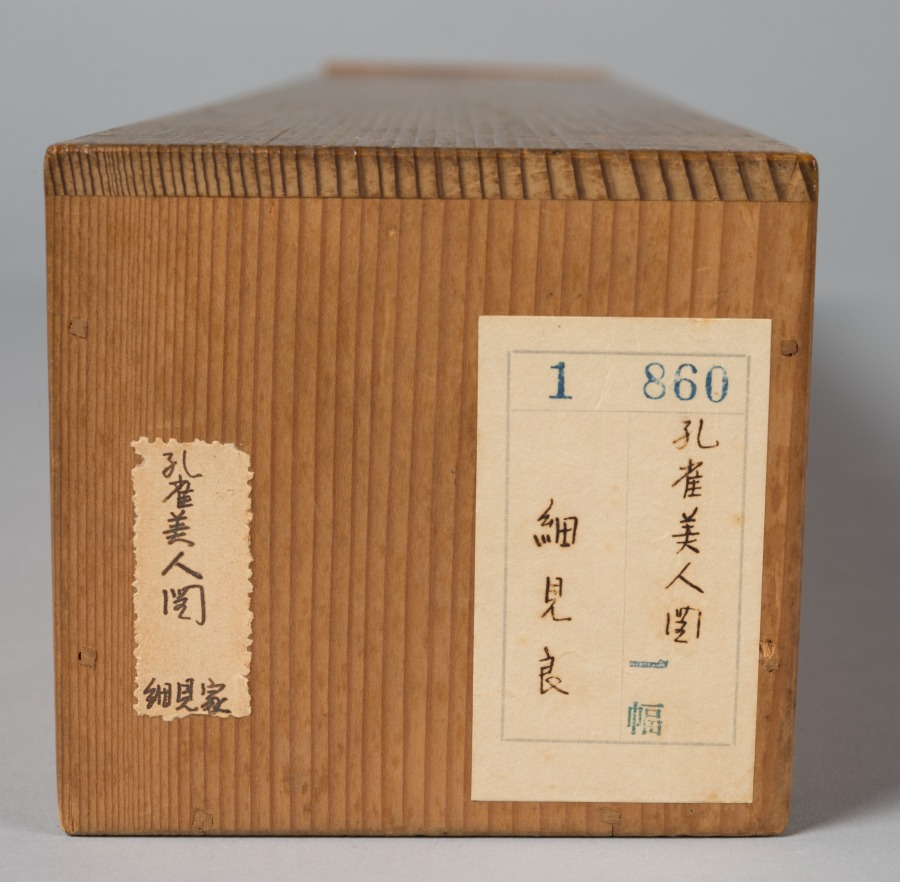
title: Beauty (Bijin)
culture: Japan, Edo period (1615–1868)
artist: Katsushika Hokusai (Japanese, 1760–1849)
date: c. 1775–1849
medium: hanging scroll; ink and color on paper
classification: Painting